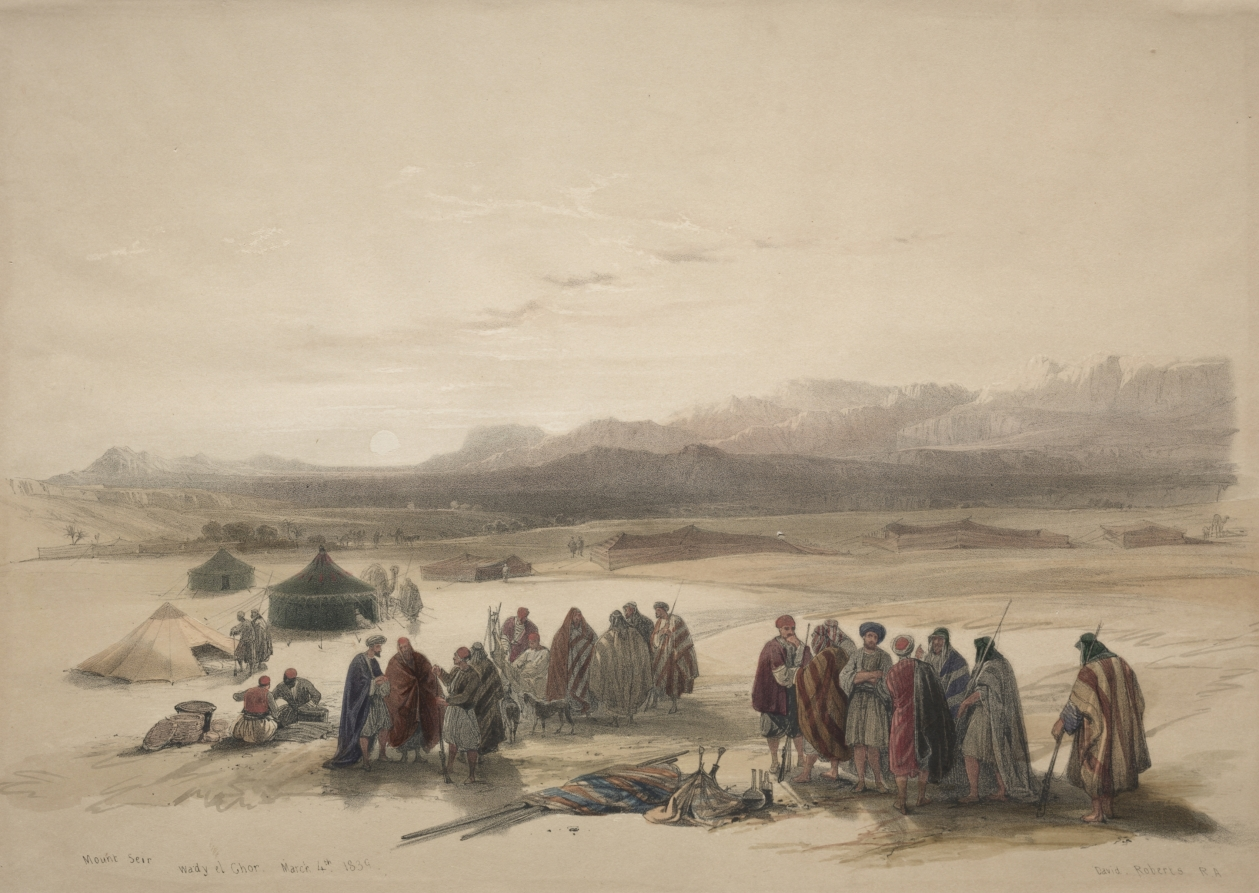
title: Mount Seir Wady el Chor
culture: England, 19th century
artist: David Roberts (Scottish, 1796–1864)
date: 1839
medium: color lithograph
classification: Print